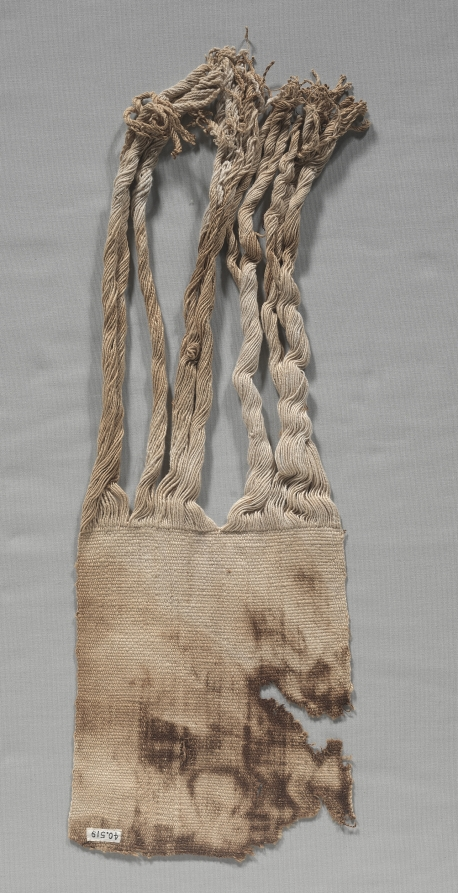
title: Mummy Bundle "Mask"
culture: Peru, South Coast, Ica Valley, Ocucaje site, Paracas style (700 BCE–1 CE)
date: 200–1 BCE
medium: plain warp-faced cloth, painted: cotton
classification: Textile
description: The Paracas people of Peru's South Coast buried their dead in pear-shaped mummy bundles made of a seated human body carefully wrapped in garments and other textiles. Sometimes a painted cloth was placed at the top of the bundle, as though it served as the bundle's face, head, or "mask." The cloth was padded on the back so it curved outward like a face, and the tress-like yarns (unwoven warps) at the upper edge were arranged around a solid cotton disk that, in turn, was wrapped with a headband. Some cloths were painted with mask-like faces, and others with full figures, apparently mythical creatures.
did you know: These masks fall into two categories, those with only a face and those with a full-bodied figure.